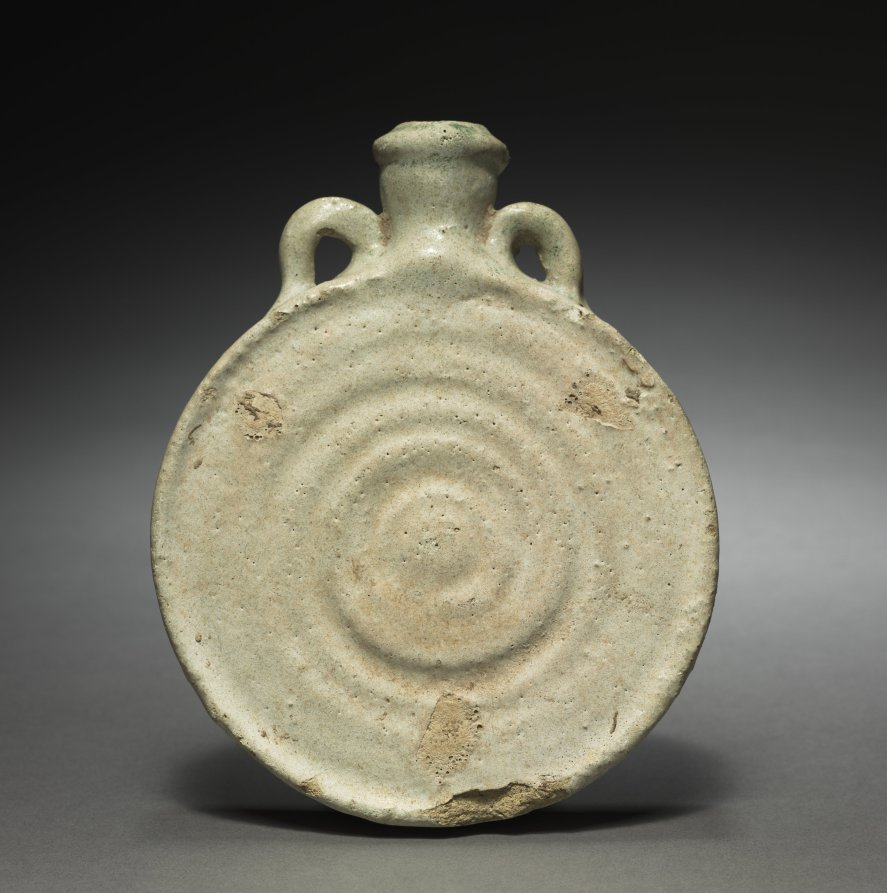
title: Pilgrim Flask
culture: Parthian Empire (247 BCE–224 CE)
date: 1–200 CE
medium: terracotta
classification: Ceramic